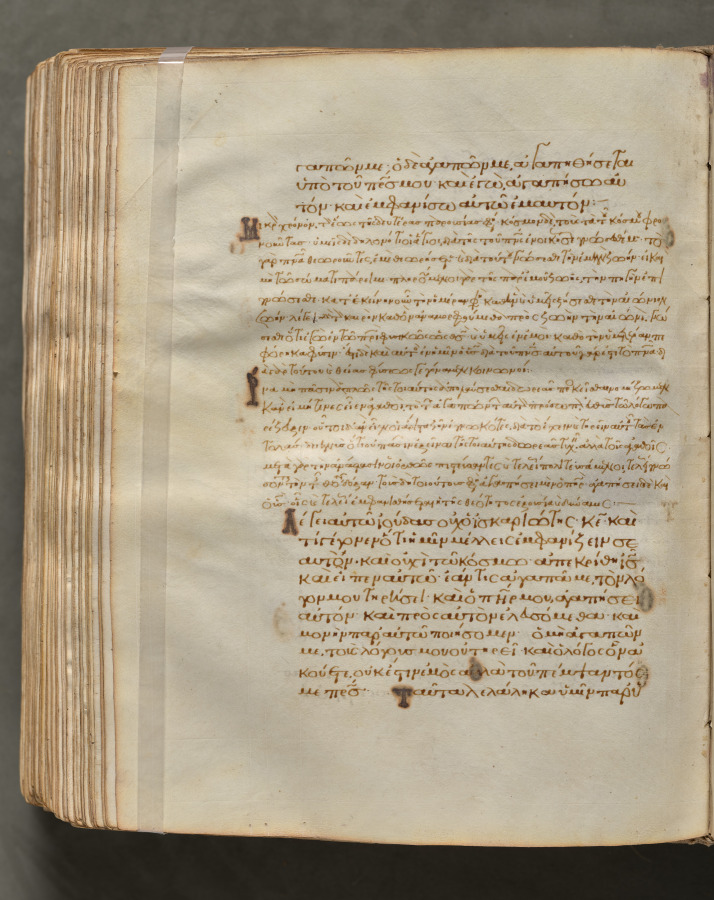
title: Text, folio 394 (verso), from a Gospel Book with Commentaries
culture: Byzantium, Constantinople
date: c. 1000–1100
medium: ink, tempera, and gold on vellum; leather binding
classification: Bound Volume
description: Each of the four gospels in this book opens on a page with brilliantly illuminated borders depicting the author of the text as well as birds—principally peacocks, symbols of the immortality of the soul—and fountains, representing the fountain of life and the salvation of the soul. This volume consists of 428 leaves with texts in Greek. Its level of sophistication suggests that it was probably written and decorated in a monastery in Constantinople.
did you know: Gospel books were carried in procession through Byzantine churches.